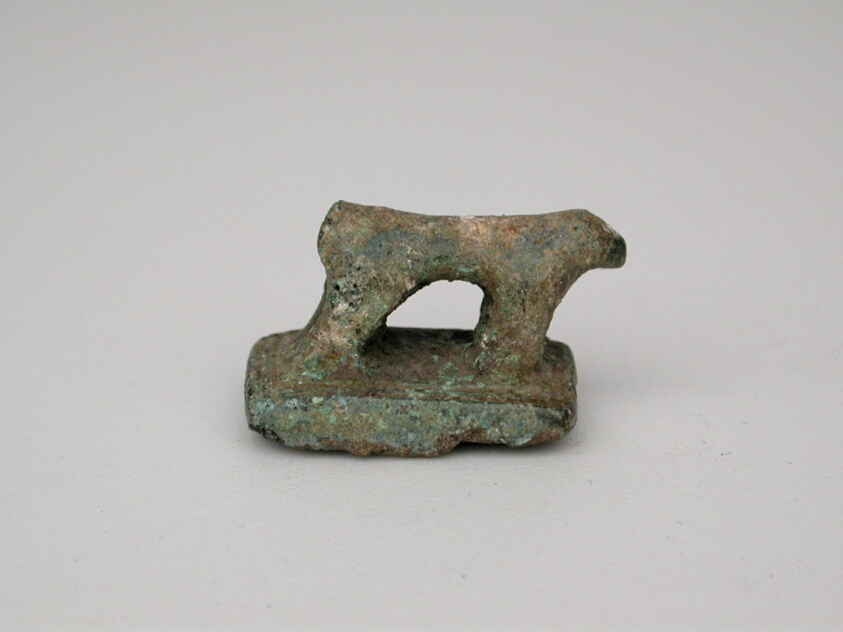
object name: Decorative Arts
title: Seal with Quadruped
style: geometric, ancient, greek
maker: Greek; Thessaly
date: Geometric Period (800–600 BCE)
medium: Bronze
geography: Thessalía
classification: votive offering; seal; ex-voto; decorative arts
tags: animals